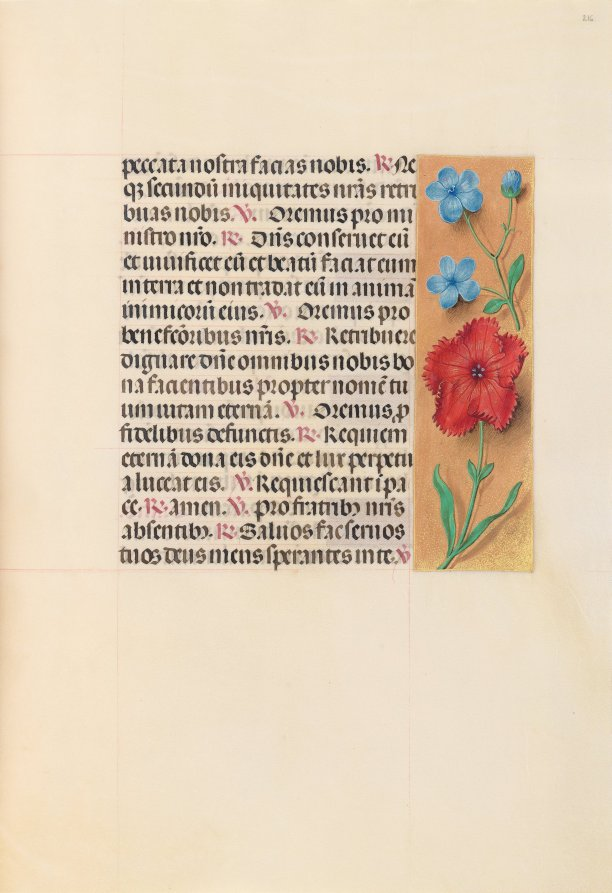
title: Hours of Queen Isabella the Catholic, Queen of Spain: Fol. 216r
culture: Flanders, Ghent and Bruges, late 15th century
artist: Master of the First Prayerbook of Maximillian (Flemish, c. 1444–1519)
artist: and Associates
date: c. 1500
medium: ink, tempera, and gold on vellum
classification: Bound Volume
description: This manuscript was illuminated by a circle of at least five highly organized manuscript painters active in the Flemish cities of Ghent and Bruges. The principal illuminator was Alexander Bening, who painted the majority of the book's miniatures. Manuscripts produced by this circle of artists are renowned for the decoration of their borders, which typically feature a rich variety of realistically-painted flowers, birds, and butterflies. This prayer book, called a book of hours, was intended not for a cleric, but for the private devotions of a lay person-in this case, Isabella the Catholic, Queen of Spain (1451-1504). Isabella's coat of arms embellishes the book's frontispiece. It is unlikely that the book was commissioned by the Queen herself; rather, she probably received it as a diplomatic gift from someone courting her patronage, perhaps Cardinal Francisco Jimenez de Cisneros. A Franciscan friar, Jimenez was dependent upon Isabella for his advancement, first to the post of Queen's confessor in 1492, and then to Archbishop of Toledo in 1495.